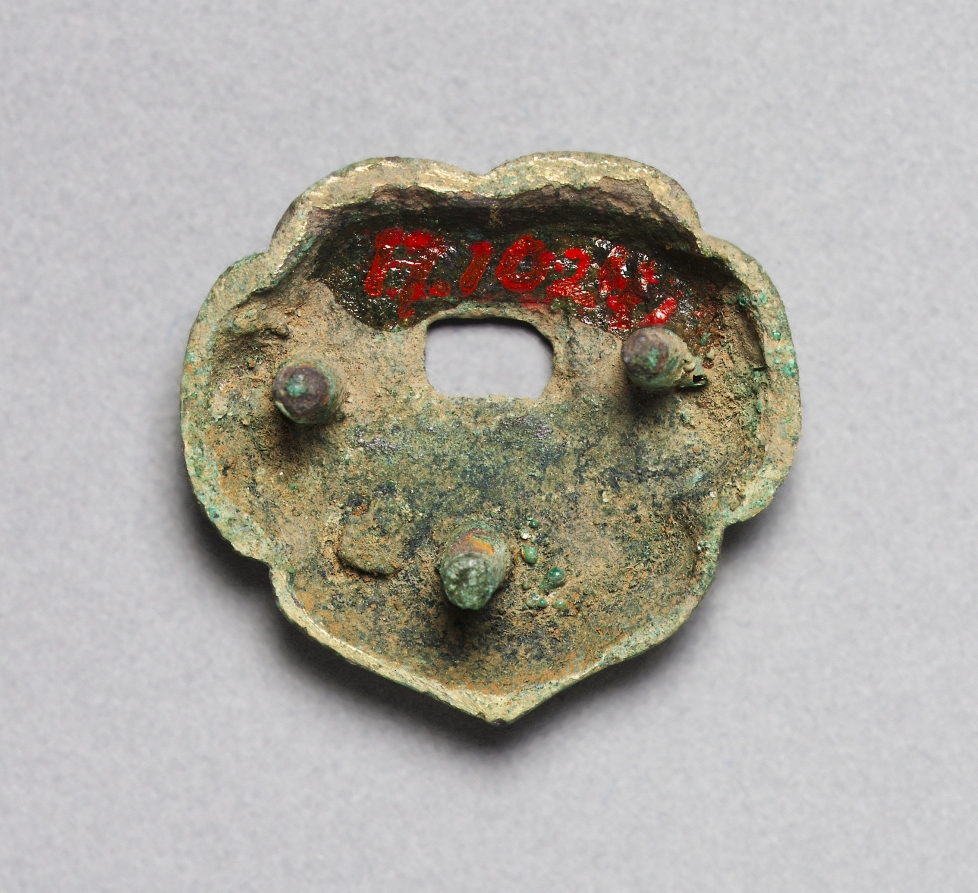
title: Nail Cover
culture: Korea, Goryeo dynasty (918–1392)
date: 918–1392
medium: bronze gilt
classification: Metalwork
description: Metallurgy advanced remarkably in the Goryeo period (918–1392), explaining why a large quantity of gilt-bronze artifacts were found in burial sites. This particular object was used to decorate a wooden coffin.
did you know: This particular object was used to decorate a wooden coffin.